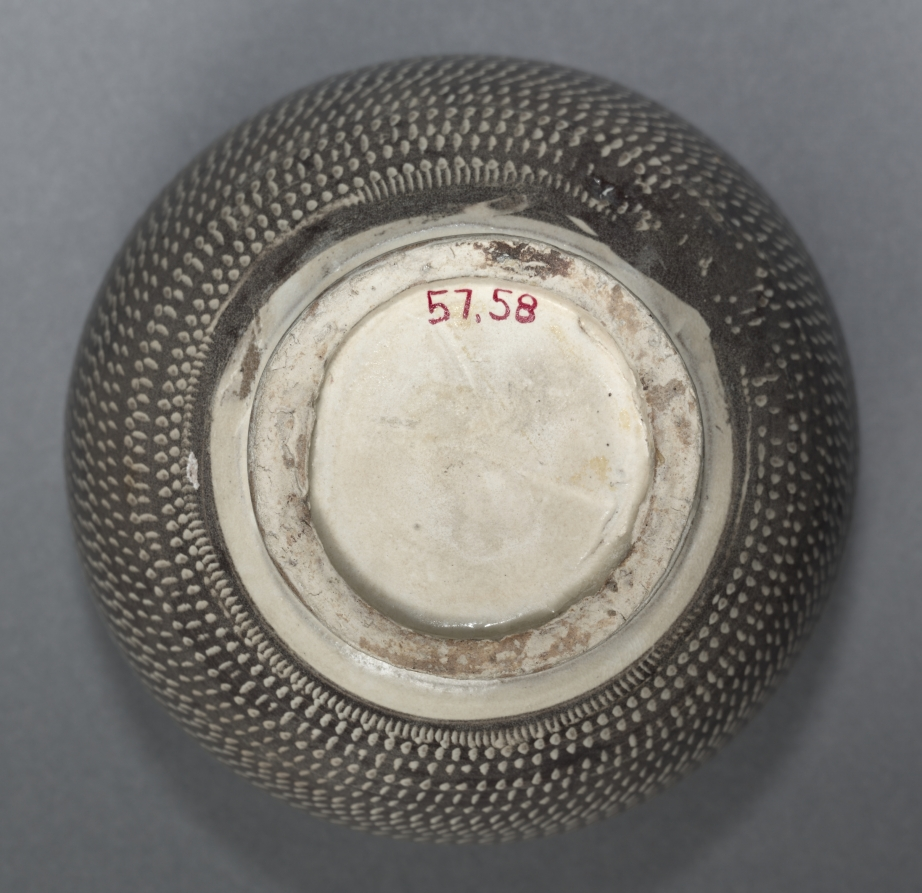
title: Jar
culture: Northern China, Northern Song (960-1127) or Jin dynasty (1115-1234)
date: 1100s-1200s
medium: glazed stoneware with roulette decoration, Cizhou ware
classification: Ceramic